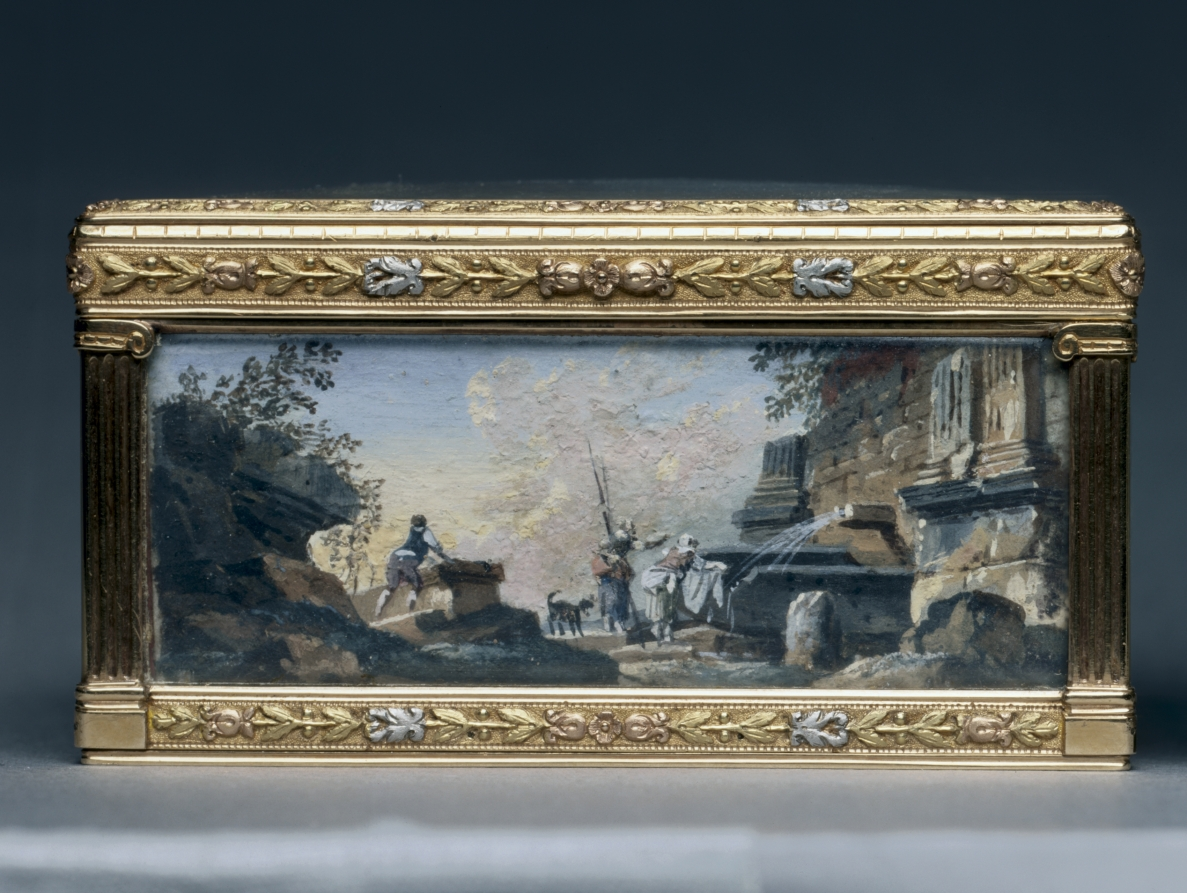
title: Rectangular Box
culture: France, 19th century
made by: Alexandre Leferre (French)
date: c. 1840–1850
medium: gouache miniatures mounted on gold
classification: Miscellaneous